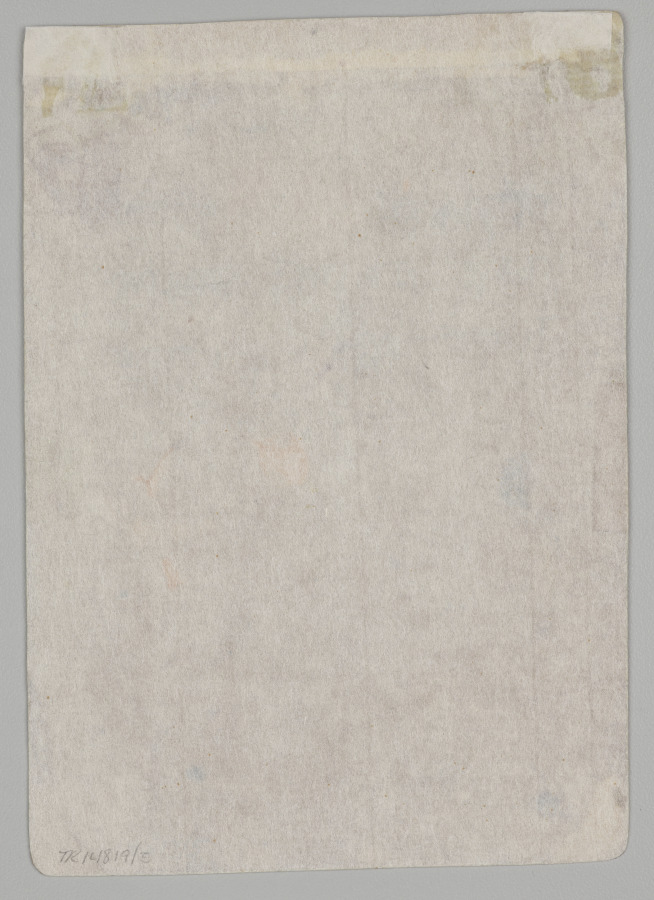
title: Divine couple seated in a lotus blossom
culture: Northern India, Pahari Region, Himachal Pradesh, Rajput Kingdom of Kangra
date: early 1800s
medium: Gum tempera and gold on paper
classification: Painting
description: A gigantic, thousand-petaled lotus flower provides an intimate setting for the lovers. They sit on the seed pod of another full-blown lotus flower, which indicates their transcendent nature by elevating them from the mire of the earth. Shown with full face forward in all white, the four-armed male deity has the all-seeing third eye in his brow and holds only a manuscript. The red goddess on his lap grasps a lotus flower in one hand, which communicates her benign and peaceful nature. At the bottom are offerings of flowers, incense, oil lamps, and jeweled cups of pure water or liquor.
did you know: The five-part butter lamp at the lower right is lit with flames, and smoke wafts from the censer.